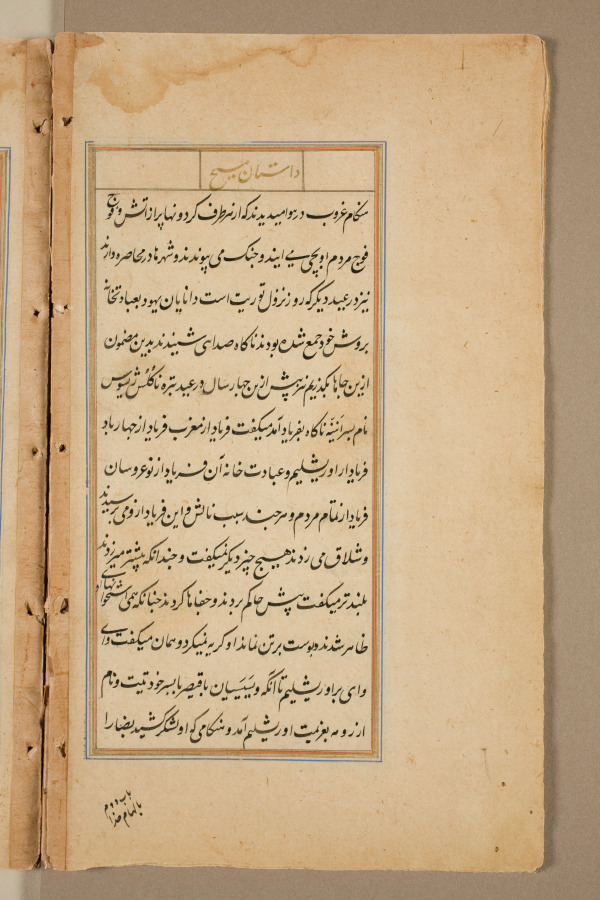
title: Text page from a Mirror of Holiness (Mir’at al-quds) of Father Jerome Xavier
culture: Mughal India, Allahabad, made for Prince Salim (1569–1627)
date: 1602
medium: Ink and gold on paper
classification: Manuscript